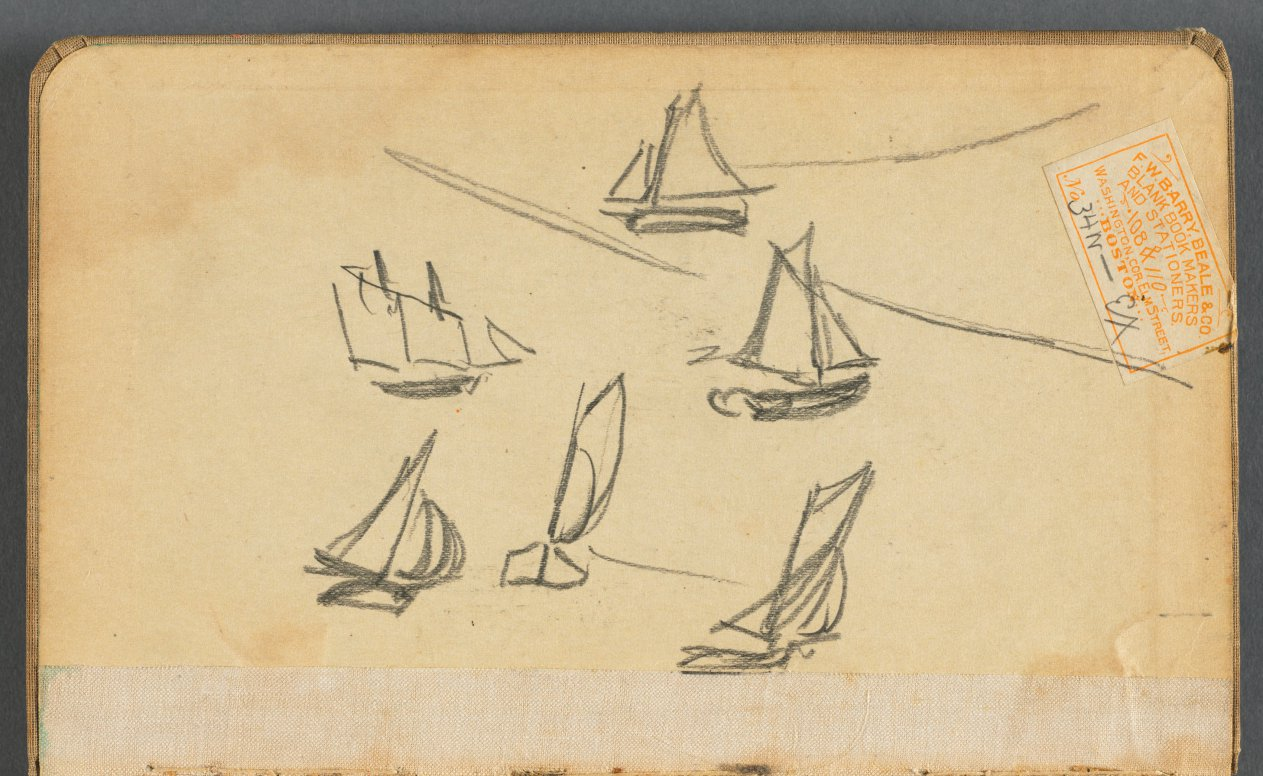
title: Sketchbook, (I): Sailboats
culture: America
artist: Maurice Prendergast (American, born Newfoundland [now Canada], 1858–1924)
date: 1905–10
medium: graphite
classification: Bound Volume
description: This sketchbook contains 69 pages of drawings, a diary largely devoted to the state of the artist's health, and a three-page discourse on the nature of genius and ideas.